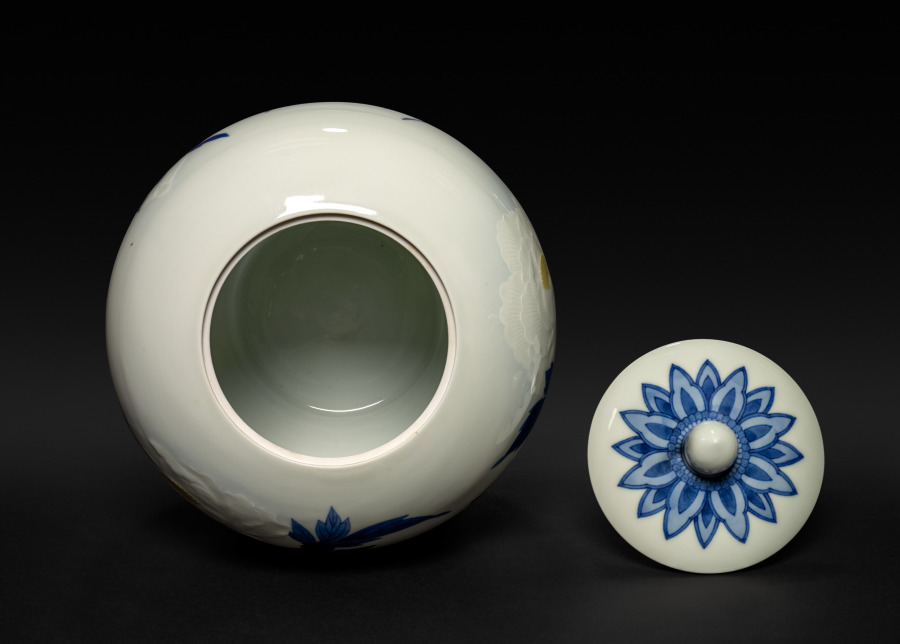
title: Lidded Jar with Peonies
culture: Japan, Meiji period (1868–1912)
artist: Seifū Yohei III (Japanese, 1851–1914)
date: 1897–1912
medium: Porcelain with molded and carved design and underglaze color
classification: Ceramic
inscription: 大日本清風造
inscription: 金聲玉振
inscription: 帝室技芸員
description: The petals of the large, white peonies on this jar were made by applying molded clay to the body and incising the clay with lines for definition. The flowers’ centers were then painted with yellow, along with the leaves in cobalt blue line and wash. A subtle blue gradation was also added all around the flowers using a masking method. The lid, with its treasured jewel-shaped finial, was also decorated with foliate motifs in underglaze cobalt blue. Finally, a transparent glaze was applied over the entire body of both the jar and lid. It is a special demonstration of Yohei III’s use of precision and control to create a completely balanced composition.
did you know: Seifū Yohei III drew inspiration from Qing dynasty Chinese wares but experimented widely with new glazing techniques.